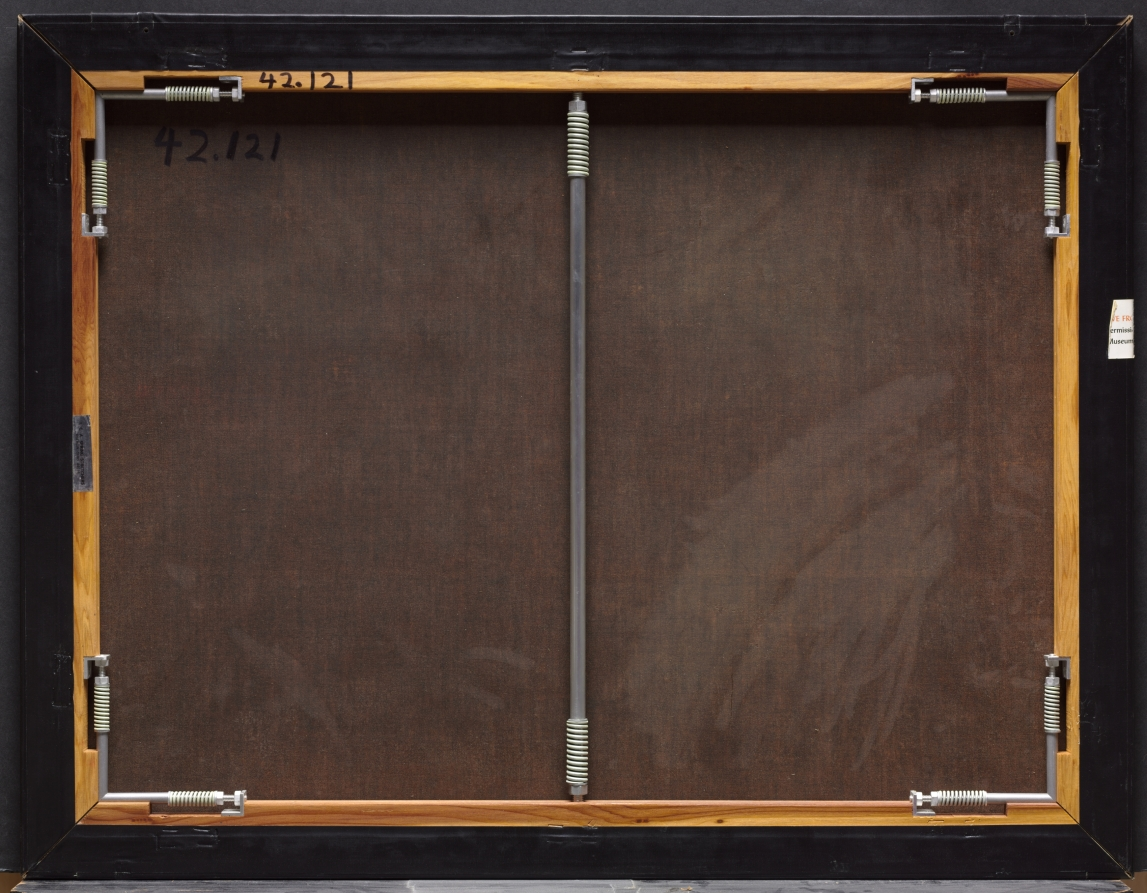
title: The Lone Sentinel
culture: America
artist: Henry Ward Ranger (American, 1858–1916)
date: 1895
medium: oil on canvas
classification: Painting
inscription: Signed lower left: "H W Ranger 95"